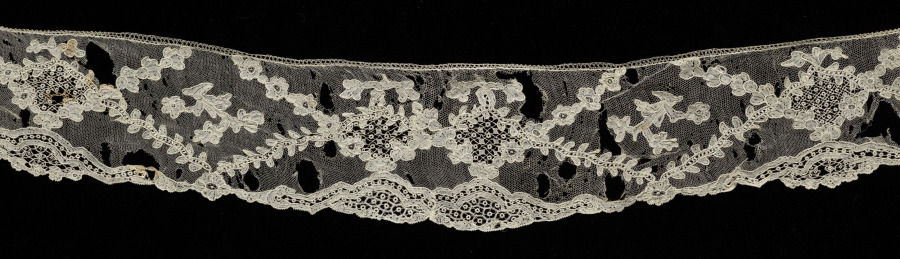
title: Lace Edging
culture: Italy, Burano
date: 1750–1800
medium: Needle lace (Burano Point)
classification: Lace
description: Although made in Italy, the style of this lace fragment is French.